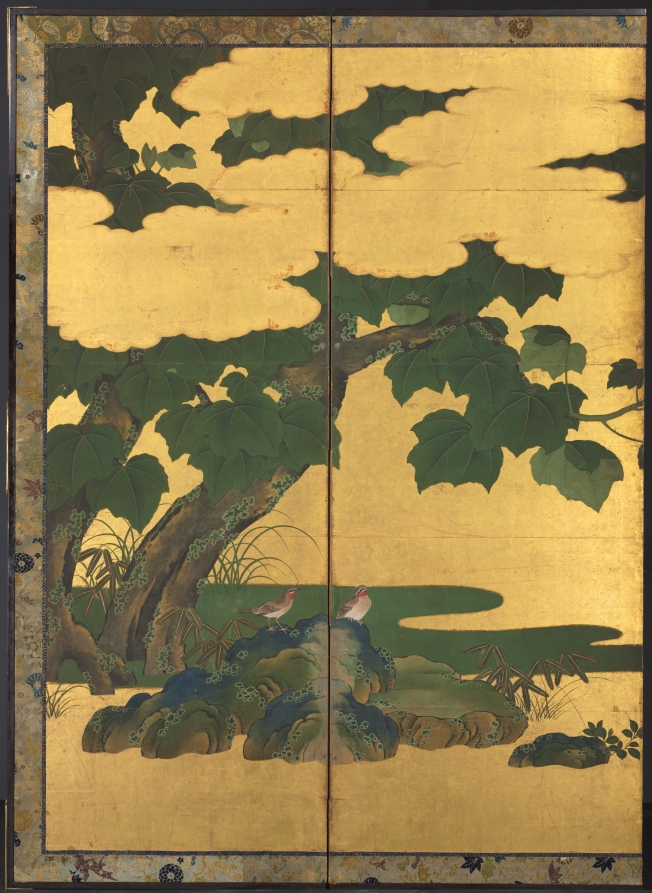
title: Phoenixes and Paulownia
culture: Japan, Momoyama period (1573–1615)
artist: attributed to Tosa Mitsuyoshi (Japanese, 1539–1613)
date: late 1500s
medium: One of a pair of six-panel screens; ink, color, and gold on gilded paper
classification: Painting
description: The immense heraldic birds on display in these byøbu reflect the Momoyama era's spirit of newly gained self-confidence and an affinity for grand expressive statements in painting, architecture, the textile and ceramic arts, as well as garden design. While that period preceded the arrival of prosperity, it clearly marked an extra---ordinary moment in Japanese cultural history, one frequently compared with the twelfth century of the Heian period. Through the extensive use of gold-foil backgrounds rather than the somber palette of carefully orchestrated ink tones evident in Muromachi byøbu, patrons colla-borated with artists as well as craftsmen in fostering a decidedly new look in much of Japanese painting. Here for instance there is no imaginary vista suggesting China's vast waterways and mountain ranges. The setting is composed instead of highly stylized lozenges of mineral green paint, suggesting the earth from which clumps of grass, flowering plants, and towering bamboo and paulownia trees emerge. Clusters of lumpy, blue-green rocks dotted with lichen provide stabilizing three-dimensional foils for these islands of vegetation as well as the all-encompassing flat, golden surface. The glorious artificiality of the setting precisely serves the artist's effort to compose a credible yet other-worldly vista for depicting the legendary phoenix gazing across the landscape at the pair of peacocks. Rather than an emblem of immortality, as it is in Western lore, in Japan the phoenix evolved out of its origins in Chinese mythology to become, by the sixteenth century, an auspicious symbol of political authority. Together with clusters of the distinctively shaped paulownia leaves, this long-tailed, mythical bird graced lacquerware as well as mural paintings, proclaiming an air of graceful com-mand. A characteristic infusion of temporality has been included also, through a seasonal flowering schema extending from spring to early summer (right) to fall and the advent of winter (left). Although traditionally attributed to the Tosa school master Tosa Mitsuyoshi (1539-1613), these byøbu possess neither seals nor signatures to confirm that authorship. Known for his jewel-like, modest-sized album paintings of courtly narratives such as The Tale of Genji, it is likely both studio training and contemporary fashions in patronage conspired to produce a good number of such byøbu. This example from the Momoyama era represents one such effort from a masterful Tosa painter, too little seen in Western collections.